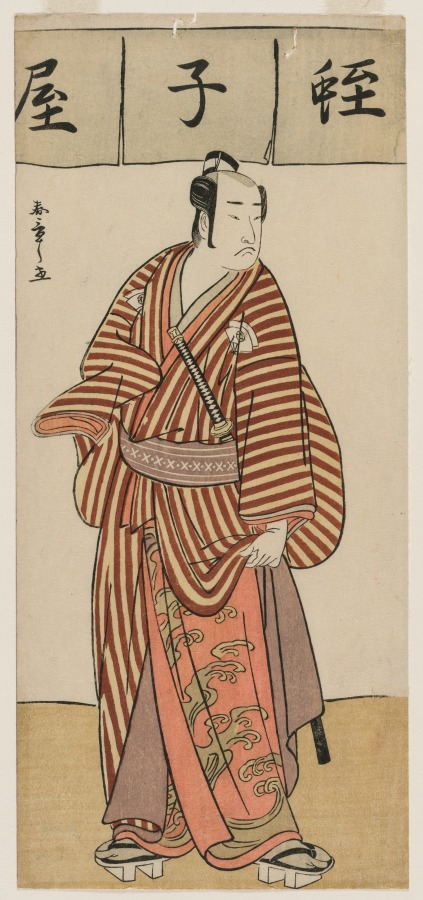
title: Onoe Matsusuke I as Ebisu, from The Stand-In Seven Gods of Good Fortune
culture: Japan, Edo period (1615–1868)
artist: Katsukawa Shunshō (Japanese, 1726–1792)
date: c. 1780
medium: color woodblock print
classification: Print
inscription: Signature: Shunsho ga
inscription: 蛭子屋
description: This print is from a group in which famous Kabuki theater actors who never performed together stand in for the Seven Gods of Good Fortune. Images of the Seven Gods symbolize hope for fortune in the coming year, and the set may have been made for the New Year of 1780. Here, Onoe Matsusuke I poses beneath curtains at the entrance to a place of business. They read, “House of Ebisu.” Ebisu is the god of fishermen, which may account for the wave imagery on the actor’s inner robe.